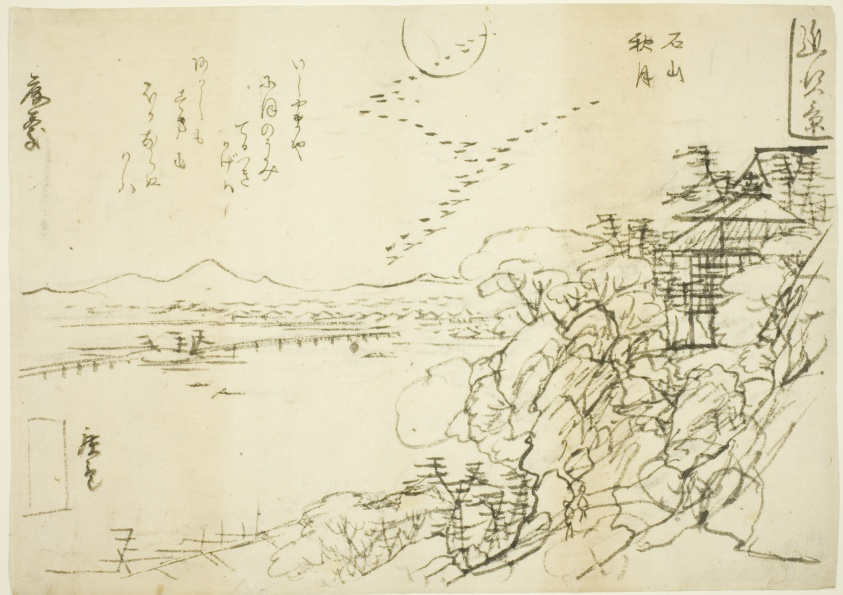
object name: Drawing and Watercolor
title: Sketch for Autumn Moon at Ishiyama Temple (Ishiyama no shugetsu), from the series "Eight Views in Omi Province (Omi hakkei)"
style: Japanese (culture or style)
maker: Utagawa Hiroshige II (Shigenobu) (Japanese, 1826–1869)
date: c. 1859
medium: Ink on paper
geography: Japan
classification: woodblock print; print; asian art